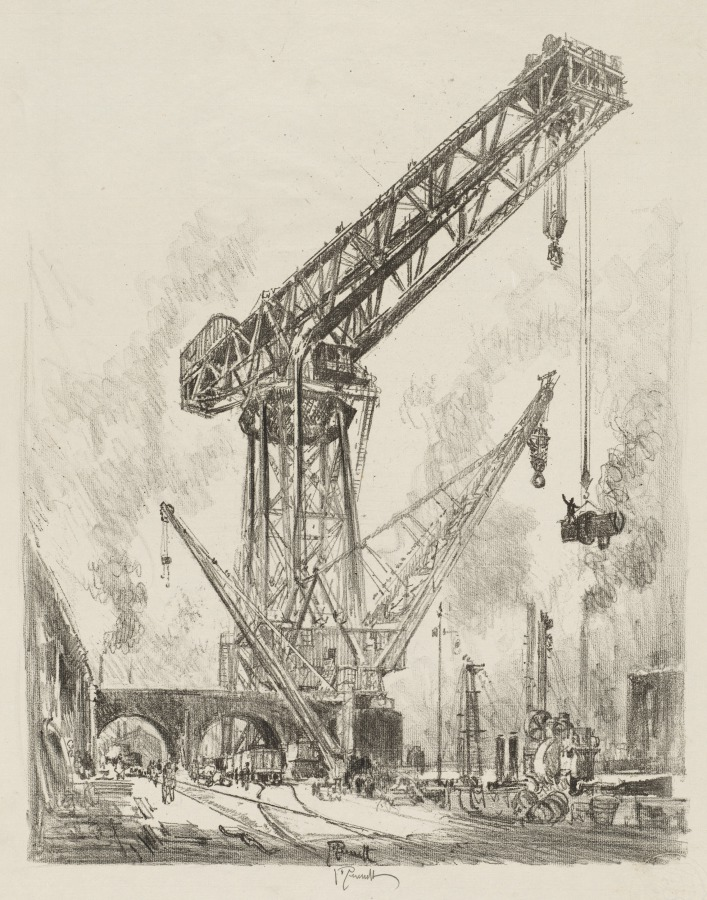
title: English War Work: Made in Germany, The Great Crane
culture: America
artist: Joseph Pennell (American, 1857–1926)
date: 1916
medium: lithograph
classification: Print